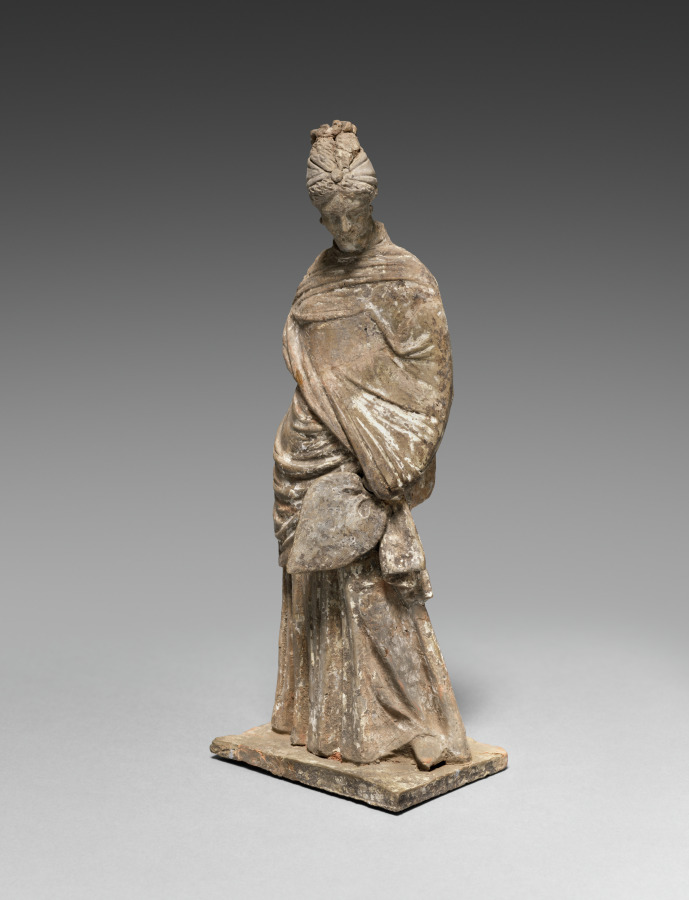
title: Figurine of a Lady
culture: Greece, Tanagra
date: 200s BCE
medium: terracotta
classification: Sculpture